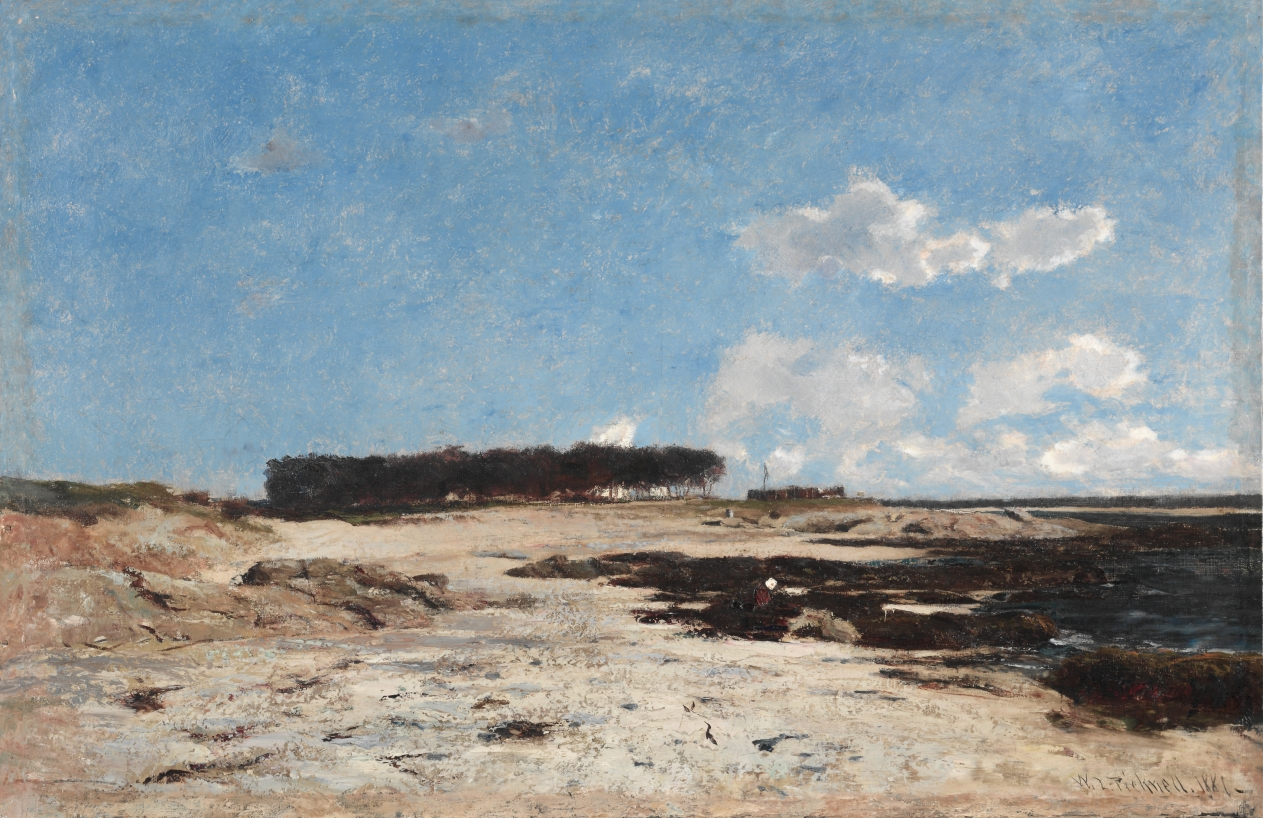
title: Pointe de Cabellou, Brittany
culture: America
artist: William L. Picknell (American, 1854–1897)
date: 1881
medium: oil on canvas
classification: Painting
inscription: Signed lower right: "W. L. Picknell. 1881-"